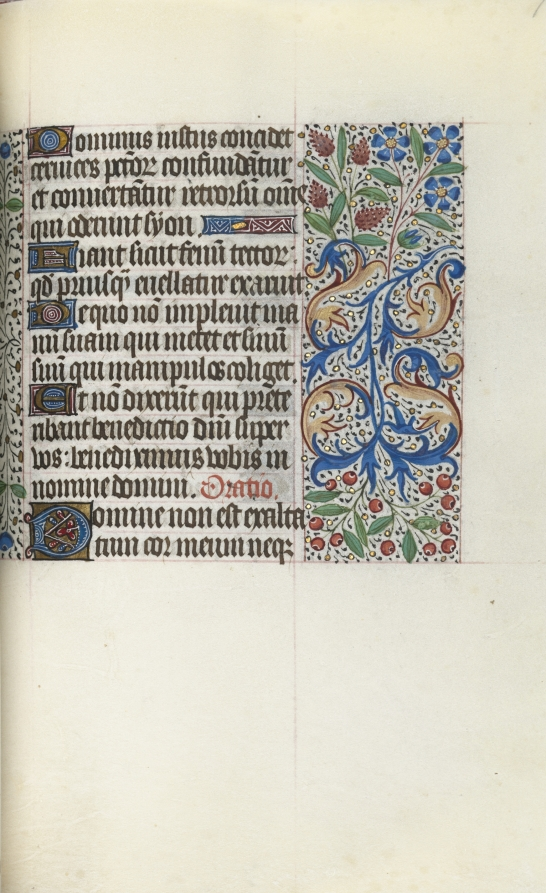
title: Book of Hours (Use of Rouen): fol. 77r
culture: France, Rouen, 15th century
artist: Master of the Geneva Latini (French, active Rouen, 1460–80)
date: c. 1470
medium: ink, tempera, and gold on vellum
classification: Bound Volume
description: In the late 1400s and early 1500s Rouen was an established and important center of book production. The city’s cathedral had a wealthy chapter that spent large sums of money to commission books and to maintain its extensive library. The stationers and booksellers would have likely been concentrated in or near the cathedral precinct. This artist, named after a manuscript now in Geneva, was Rouen’s principal illuminator during the second half of the 1400s.